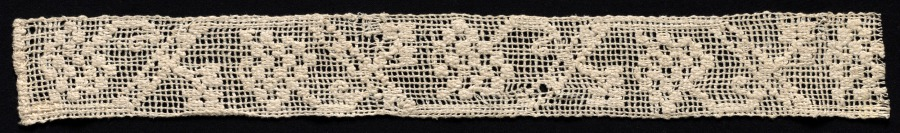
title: Fragment of a Band with Geometric Pattern and Floral Motif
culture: Italy, 1800s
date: 1800s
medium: Cotton (est.): needle lace, burato (twined ground and darned in one direction)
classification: Lace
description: A scrolling vine with budding vegetation or a tendril is a recurring pattern in needle lace. The frequent use of the motif, adapted in lace from different centuries and regions, suggests that it was found in a pattern book.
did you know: Books of patterns for lace making and other needlework were aimed at well-to-do women and girls to encourage domestic virtue.